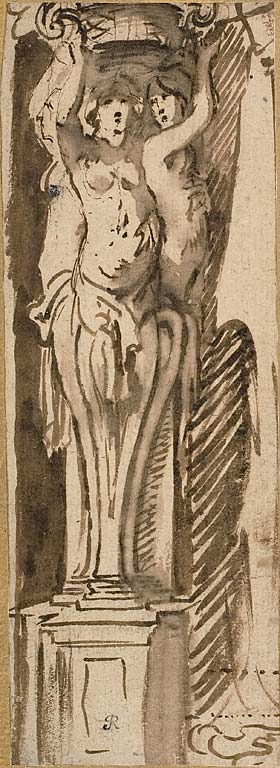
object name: Drawing and Watercolor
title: Three Caryatids Supporting a Basket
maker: Unknown Flemish Artist; possibly Philip Fruytiers (Flemish, 1610-1666); or Jacob Jordaens (Flemish, 1593-1678); or Peter Paul Rubens (Flemish, 1577-1640); or Johann Boeckhorst (Flemish, 1605-1668)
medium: Pen and brown ink, with brush and brown wash, on buff laid paper, laid down on cream laid card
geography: Flanders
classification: ink or chalk wash; drawings (visual works); prints and drawing